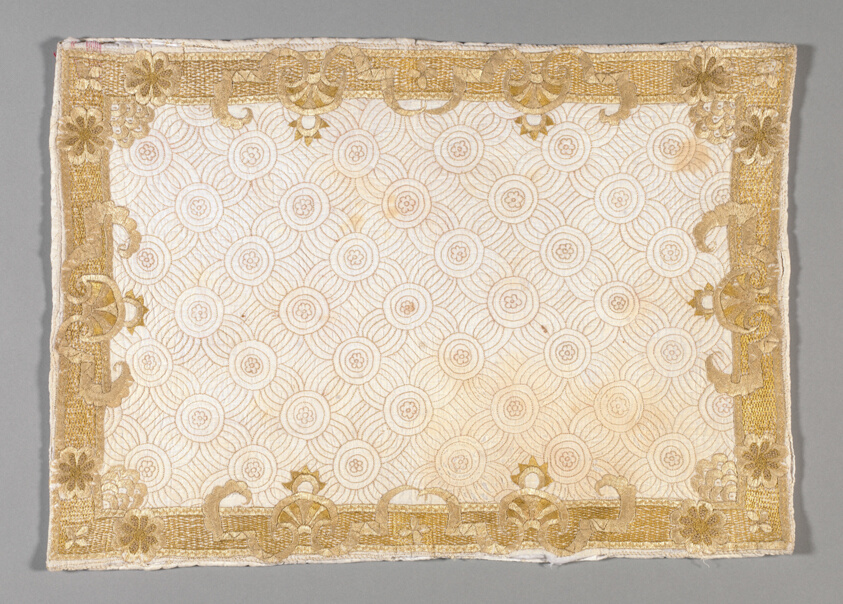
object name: Textile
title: Pillow Sham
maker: England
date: c.1720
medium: Cotton, plain weave, underlaid with linen, plain weave; embroidered with silk floss and silk yarns in back, herringbone, individual satin, and satin stitches; laid work, couching, and French knots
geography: England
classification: textile; needlework (visual works)